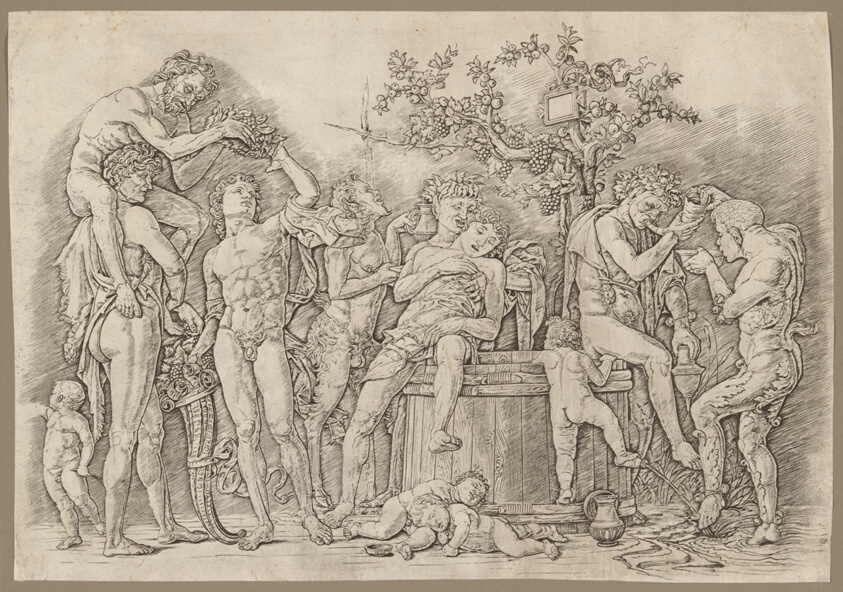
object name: Print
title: Bacchanal with a Wine Vat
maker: Workshop of Andrea Mantegna; Italian, 1431-1506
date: c. 1470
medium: Engraving on cream laid paper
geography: Italy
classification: engraving; print; prints and drawing